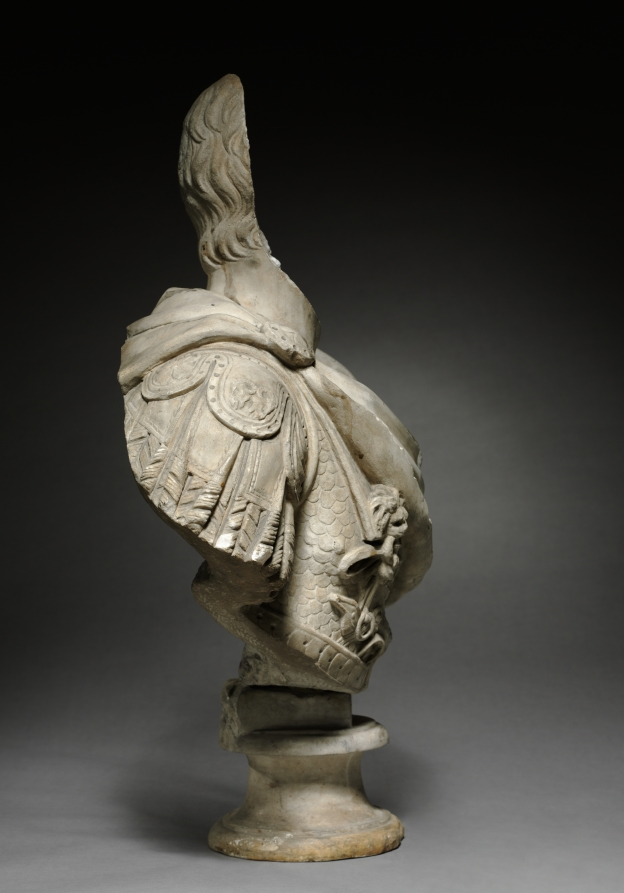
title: Bust of a Man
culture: Italy, Face: Roman, early 2nd century or later; Body: 16th century or later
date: Face: early 2nd century or later. Body: 1500s or later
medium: marble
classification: Sculpture